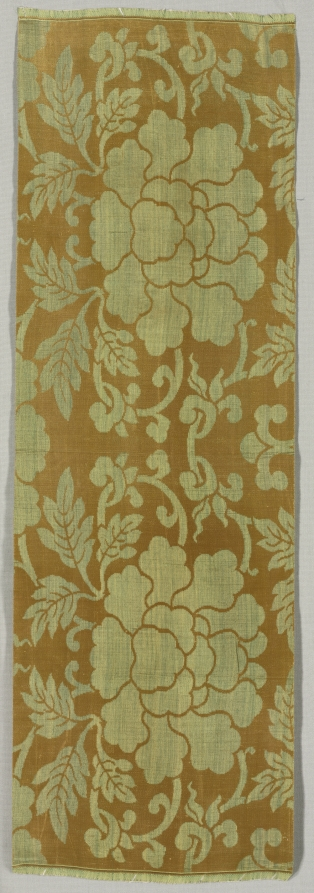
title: Textile Fragment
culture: Japan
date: 1800s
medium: silk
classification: Textile